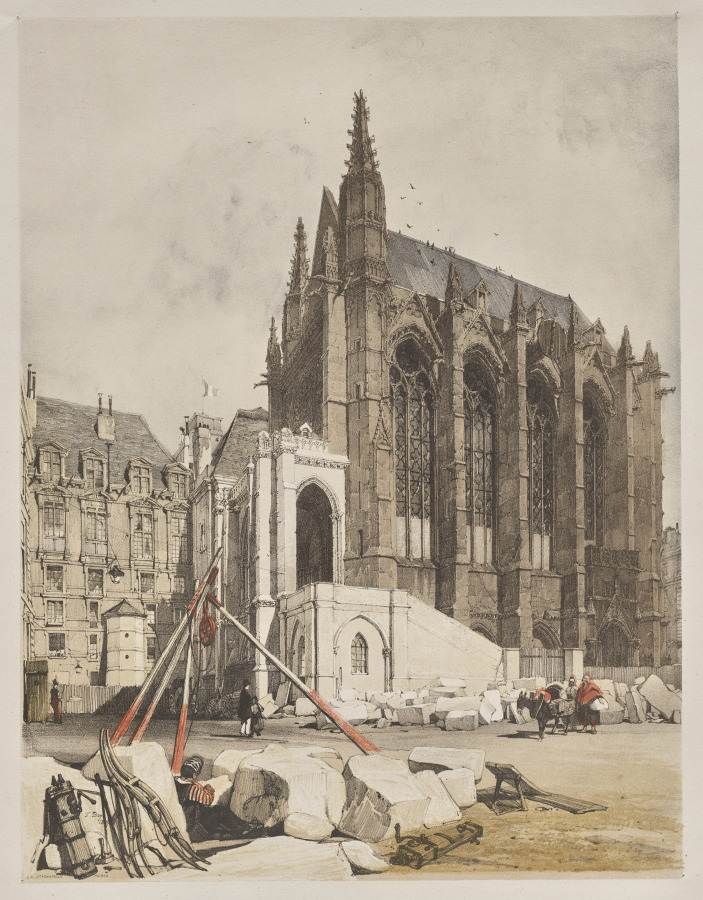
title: Picturesque Architecture in Paris, Ghent, Antwerp, Rouen: La. Ste Chapelle, Paris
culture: England, 19th century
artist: Thomas Shotter Boys (British, 1803–1874)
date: 1839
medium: lithograph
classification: Portfolio